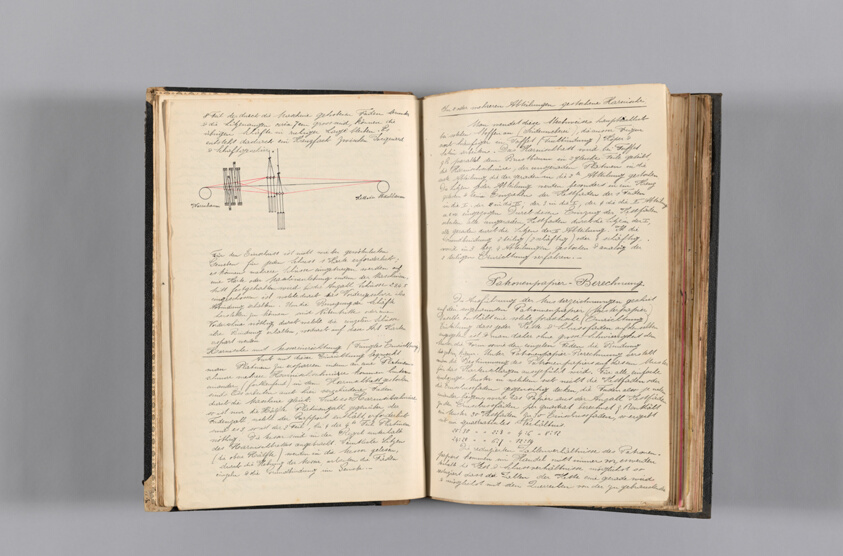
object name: Book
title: Student Notebook Containing Notes, Diagrams and Swatches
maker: Alfred Fehr (Switzerland, 1879-1955)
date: c. 1898–1900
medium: Bound notebook of technical notes and weave samples: fabrics for clothing and mixed goods, ribbed and twill cottons, and jacquard; 176 pages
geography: Germany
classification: book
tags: weaving, diagrams